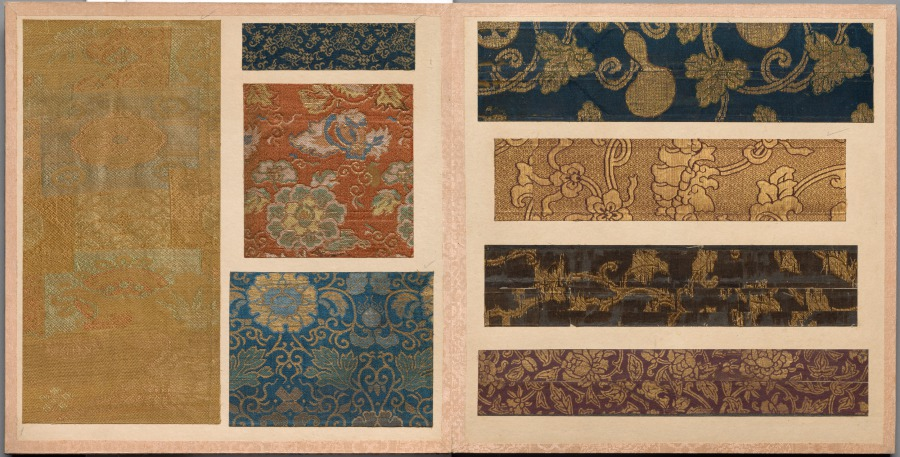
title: Album of Textile Samples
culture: Japan and China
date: 1700s–1800s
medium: silk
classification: Textile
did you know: This album has 26 pages containing 128 mounted Chinese or Japanese textile samples.